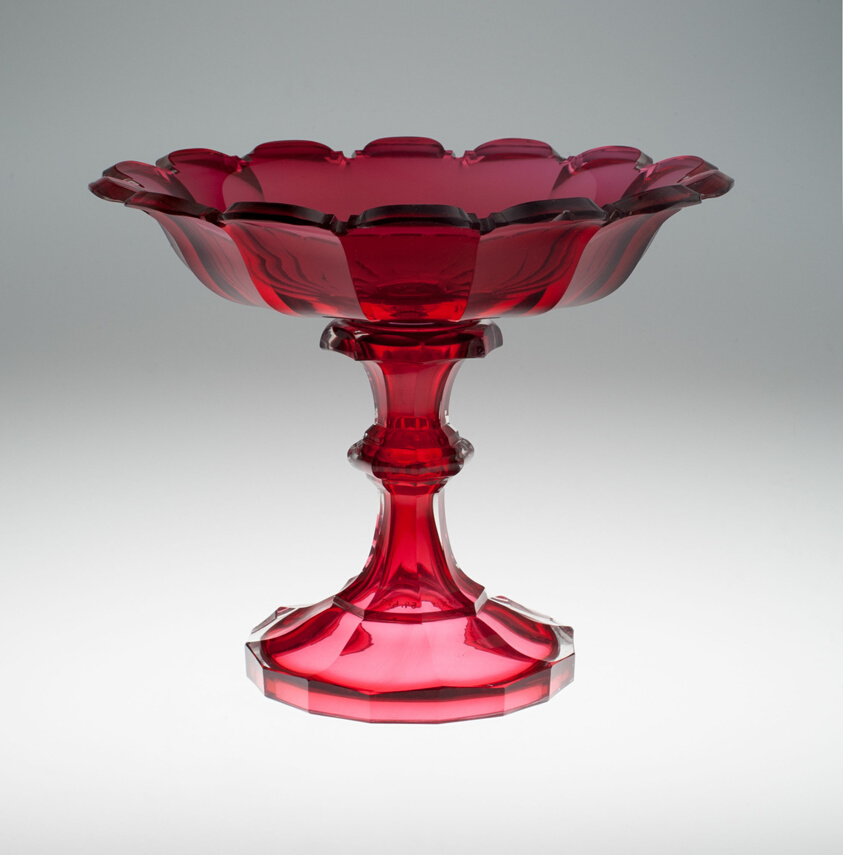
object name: Glass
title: Compote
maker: Bohemia, Czech Republic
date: c. 1850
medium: Glass with red flashing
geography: Bohemia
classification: compote; dish (vessel); glass; european decorative arts